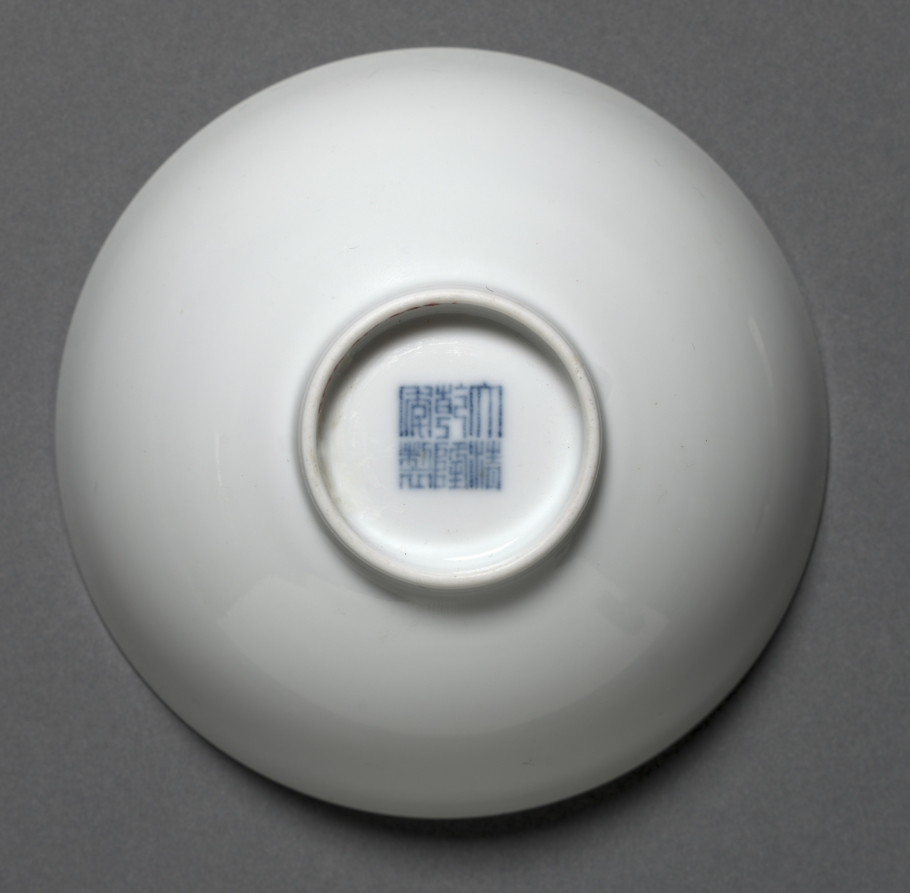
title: Bowl with Orchids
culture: China, Jiangxi province, Jingdezhen kilns, Qing dynasty (1644-1911), Qianlong mark and reign (1736-95)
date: 1736–1795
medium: porcelain with famille rose overglaze enamel decoration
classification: Ceramic